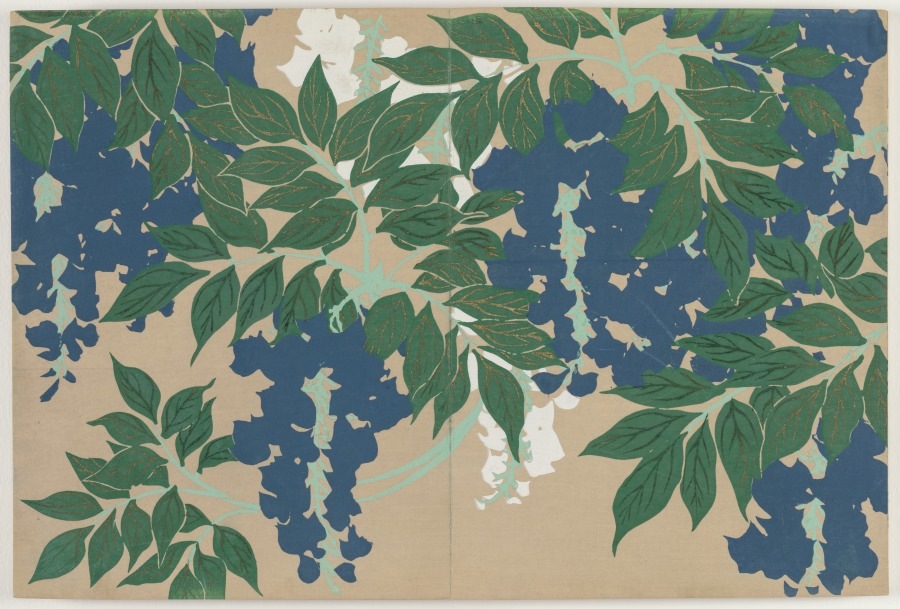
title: Flowers of a Hundred Worlds (Momoyogusa): Wisteria (Fuji)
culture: Japan, Meiji period (1868–1912)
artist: Kamisaka Sekka (Japanese, 1866–1942)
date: 1909–10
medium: color woodcuts with gold and silver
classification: Bound Volume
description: This print from a set of three woodblock printed albums displays the graphic design prowess of Kamisaka Sekka. The images were first distributed one by one to subscribers to the series but later were reissued in bound form, like this book, for mass consumers. Each print features a vignette taken from nature or Japanese literature. Many of the scenes have a long history in Japan, originating in the 900s or 1000s and having been interpreted by all manner of artists since that time. Sekka’s selections hew closely to precedents from the Rinpa style originated by painter Tawaraya Sōtatsu (c. 1570–c. 1640) and calligrapher Hon’ami Kōetsu (1558–1637).